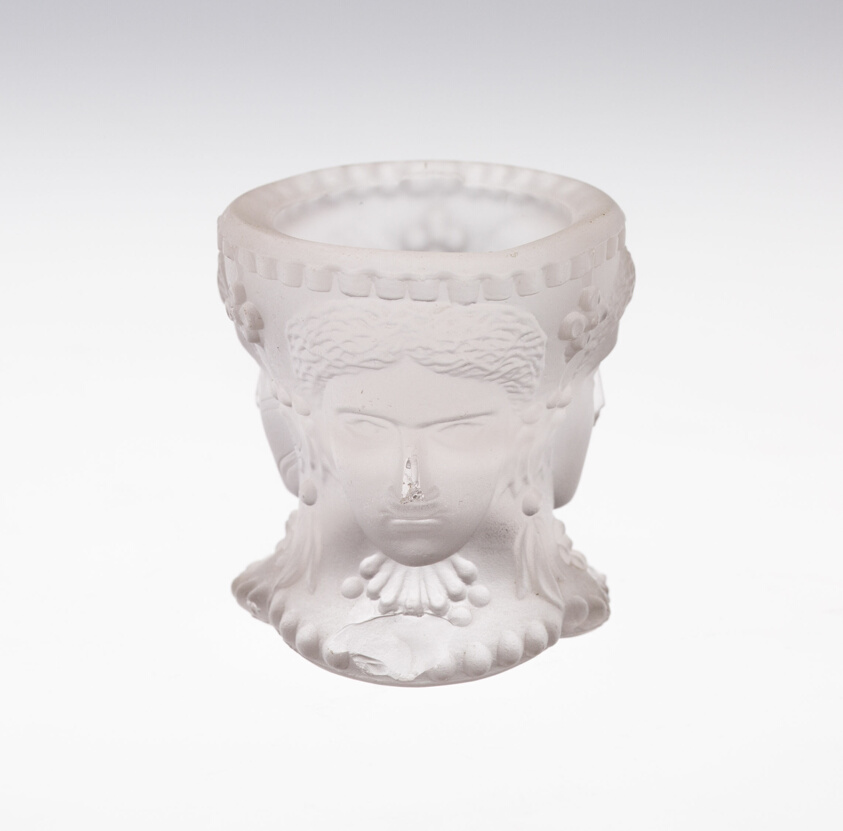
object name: Glass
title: Salt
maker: Possibly Europe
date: 19th century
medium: Glass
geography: Europe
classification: glass